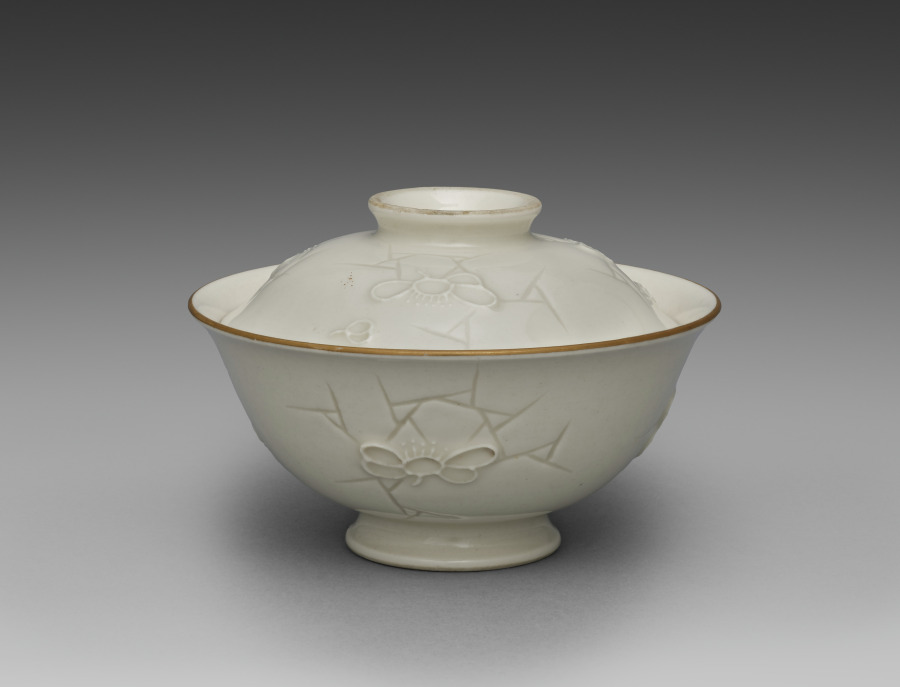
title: Covered Bowl from Dining Set with Plum Blossoms and Cracked-Ice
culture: Japan, Meiji period (1868–1912)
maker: Seifū Yohei II (Japanese, 1844–1878)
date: c. 1875–78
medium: Porcelain with molded designs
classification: Ceramic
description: Each item in this set has a delicate low-relief design of flowering plum branches over scattered, intersecting lines meant to resemble the cracked-ice surface of a frozen body of water and is signed on the base in gold pigment. While Yohei II produced many fine works in underglaze blue, like those produced by Kiyomizu Shichibei, he also made works in quite different styles later in his career, from the early 1870 s. In 1873, he was appointed purveyor to the Industrial Center of Kyoto Prefecture, a designation associated with Kyoto’s efforts to reach an international market through the port of Kobe; and from 1875 until his death, he was involved in national-level projects to present Japanese ceramics across the world. It was during this period that Yohei III was apprenticed to Yohei II, and it has been suggested that this set may in fact be an early example of Yohei III’s work, which he signed with his teacher’s name. Decorated with flowers resembling Japanese textile motifs, the set calls to mind the design of Yohei II’s pair of vases with plum blossoms in the Victoria and Albert Museum. Here, the elaborate trees created for a formal public exhibition setting have been translated into the approachable blossoms of the genteel domestic environment. While the designs are consistent across the pieces, each raised flower petal and pistil and each incised line in the ice was done by hand, so the cups, bowls, and dishes are similar yet unique. The bottoms of two boxes once identified the set’s owner, but the information has been deliberately obscured with black ink. However, inscriptions still visible appear to indicate two occasions, once at the end of July 1886 , and once again in June 1916 , when parts of the set were requested from Hokura in Niigata Prefecture. The location corresponds to a neighborhood in the present-day city of Jōetsu. The surname Tsuji 辻 also appears on a paper tag affixed to one of the box cloths. Future research may possibly reveal more about their provenance. A vase by Yohei III in a private collection combines the formal grandeur of the Yohei II vases in the Victoria and Albert Museum with the gentler design of this dining set, placing flowering plum trees against soft, scalloped-edge clouds resembling those in golden screens.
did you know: The dining wares have a creamy white coloration that the four boxes containing them identify as Korean in style.